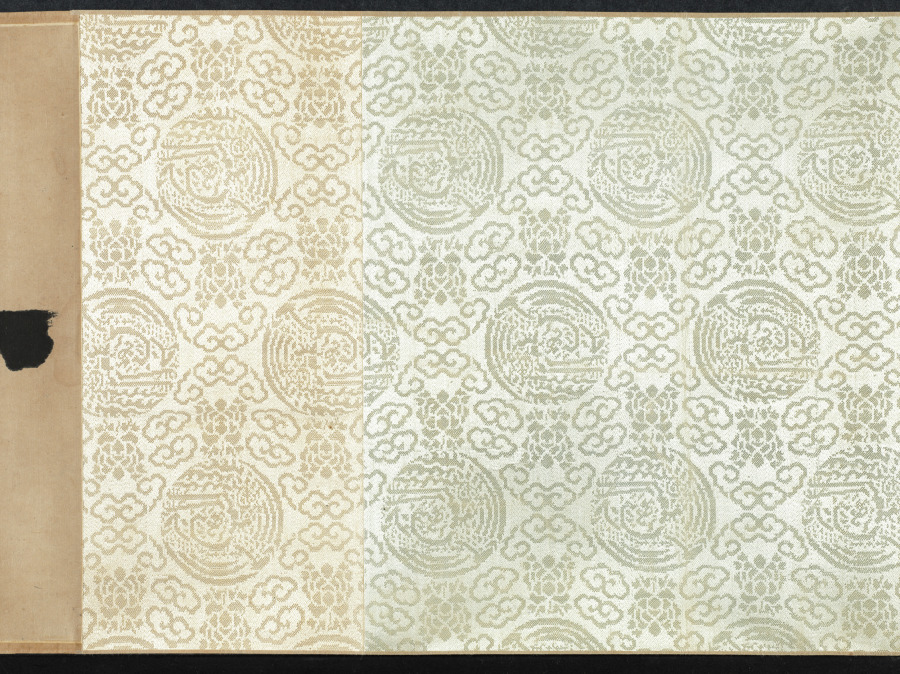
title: Dream Journey among Rivers and Mountains, no. 90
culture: China, Qing dynasty (1644-1911)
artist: Cheng Zhengkui (Chinese, 1604–1676)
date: 1658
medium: Handscroll; ink and color on paper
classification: Painting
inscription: 江山臥遊圖其九十, 青溪道人, 戊戌夏五。 [印] 程正揆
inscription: Title and inscription by Huang Yi 黃易 (1744–1802), and 3 seals.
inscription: 1 colophon and 9 additional seals: 3 seals of Dai Zhi 戴植 (active about 1821–1850); 1 colophon, dated 1914, and 3 seals of Yan Shiqing 顏世清 (1873–1929); 3 seals of Wang Nanping 王南屏 (1924–1985).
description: Cliffs and waterfalls interspersed with trees and dotted vegetation are spread over this handscroll. Long paths wind their way through villages, beside cottages, shrines, and over bridges. In the past, Chinese literati officials liked to take a “dream journey” along mountains and rivers when viewing landscape paintings in their studios. Scenery of this kind thus became a way to escape from the world of bureaucracy and administration. The painter Cheng Zhengkui used the title “Dream Journey” for a whole series of paintings, of which this is number 90. He is said to have painted 500 of them, but the actual count remains unknown.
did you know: Cheng Zhengkui planned to make 100 dream journey paintings but may have ultimately made 500.